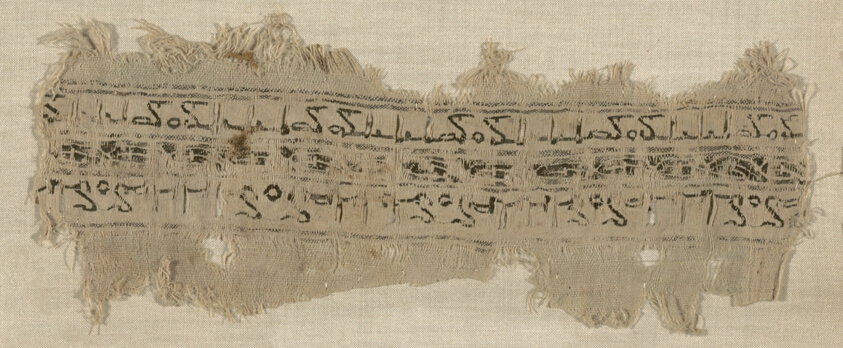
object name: Textile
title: Fragment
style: fatimid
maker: Egypt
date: Fatimid period (969–1171)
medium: Linen and silk, tapestry weave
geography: Egypt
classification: textile; weaving